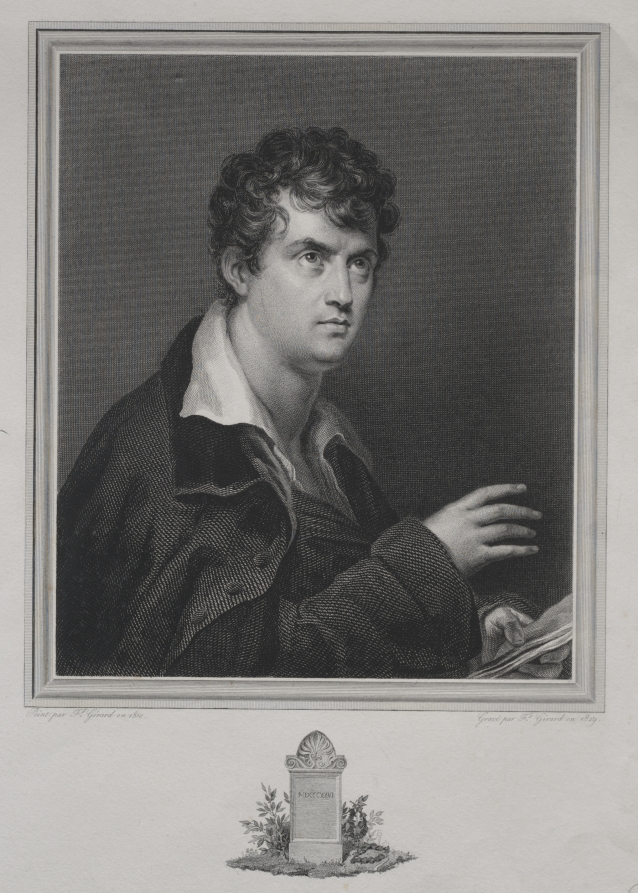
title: François Joseph Talma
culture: France, 19th century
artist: François Girard (French, 1787–1870)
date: 1829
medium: engraving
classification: Print